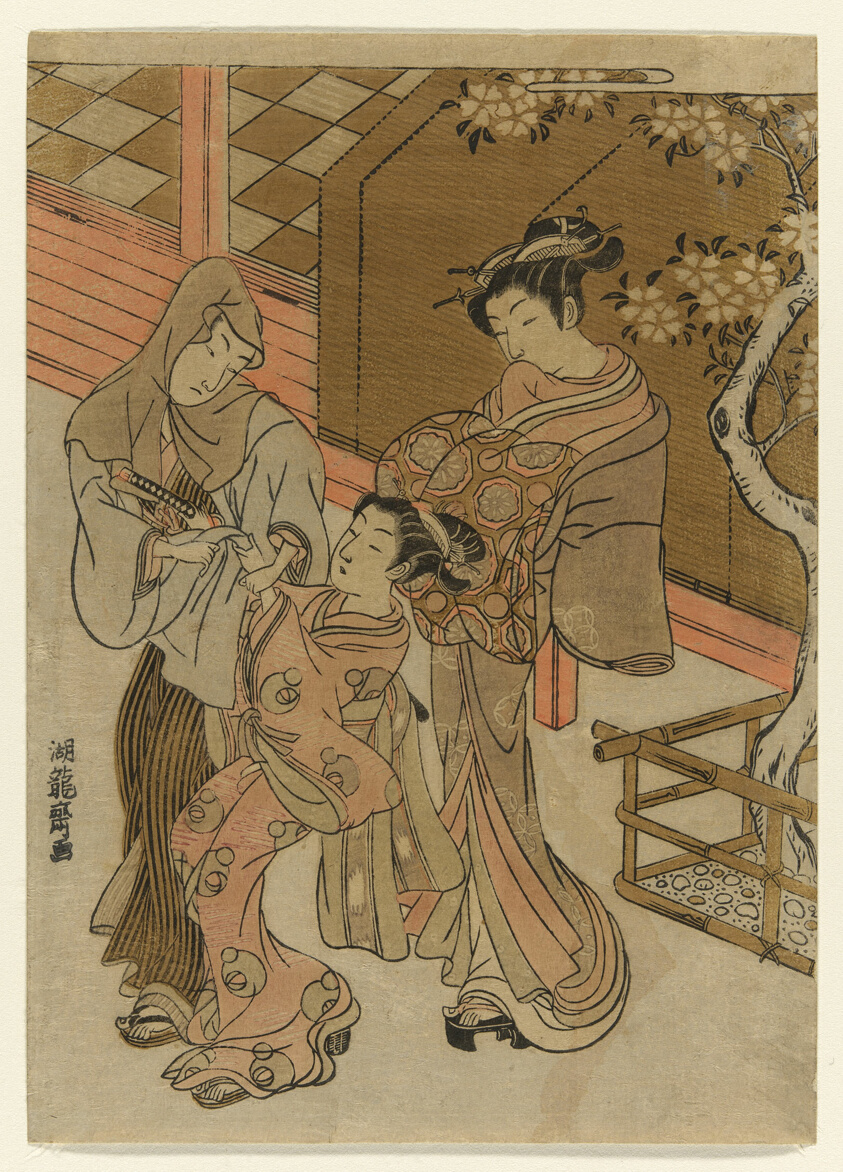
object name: Print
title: Courtesan Watching her Attendant Detain Hooded Man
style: Japanese (culture or style)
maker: Isoda Koryusai (Japanese, 1735-1790)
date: c. 1772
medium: Color woodblock print; chuban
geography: Japan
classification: woodblock print; print; asian art